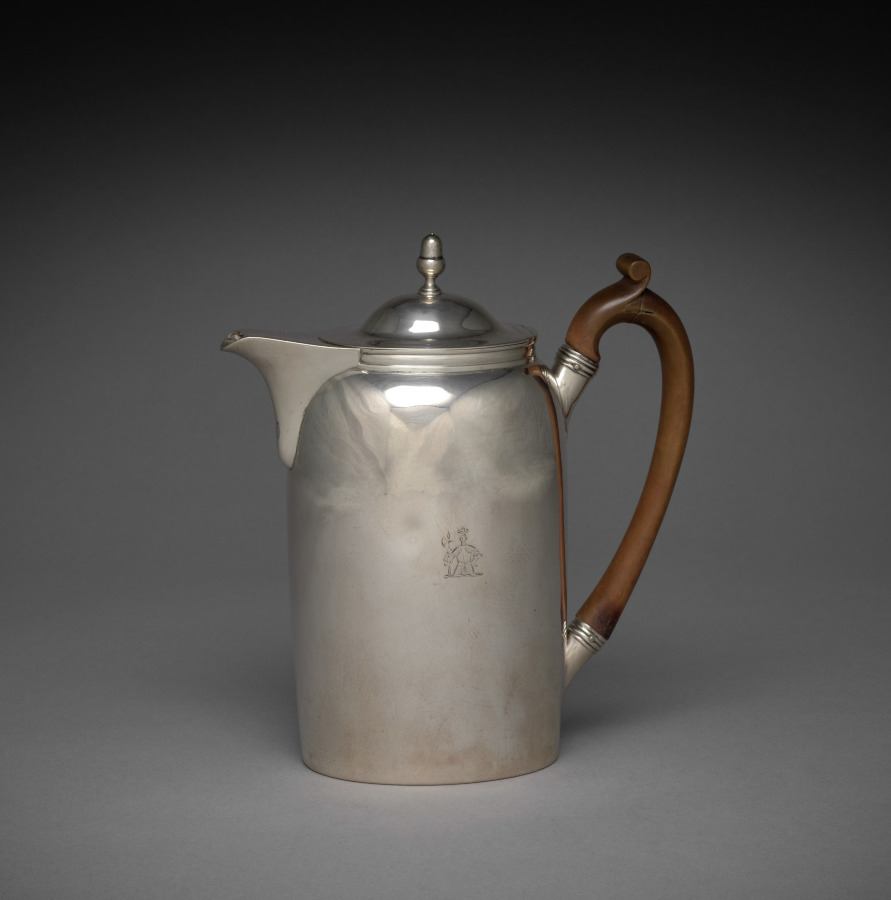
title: Hot Water Jug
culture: England, early 19th century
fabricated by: John (British) Edwards (British)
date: 1800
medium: silver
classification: Metalwork